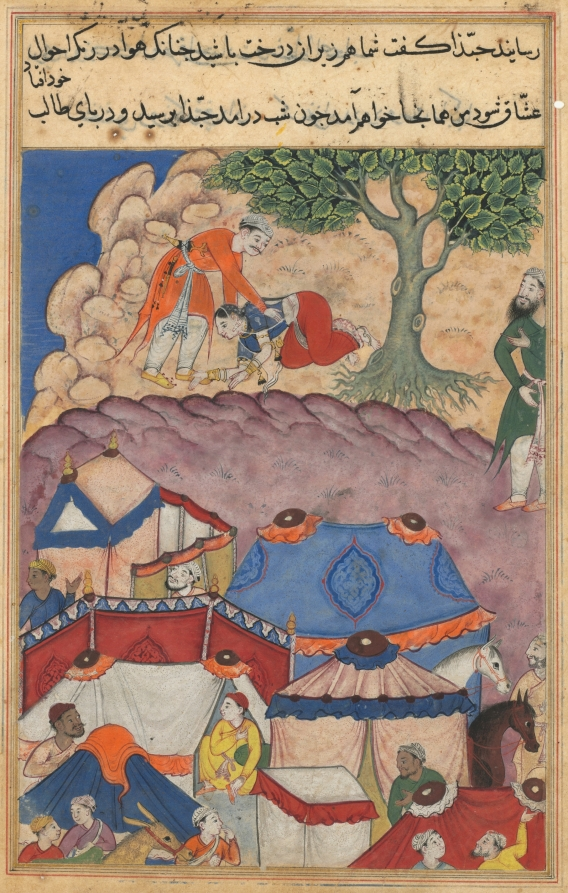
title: Habbaza meets Bashir under a tree, from a Tuti-nama (Tales of a Parrot): Twenty-fourth Night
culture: Mughal India, court of Akbar (reigned 1556–1605)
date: c. 1560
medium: gum tempera, ink, and gold on paper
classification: Painting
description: Habbaza clandestinely meets with her lover Bashir outside of her village. The two lovers have been separated by Habbaza’s husband, who learned of their affair. Bahir’s friend, who arranged the secret meeting, waits at the right. The lower register shows a scene of the activity in Habbaza’s village.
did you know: The dark sky indicates that this scene takes place at night.